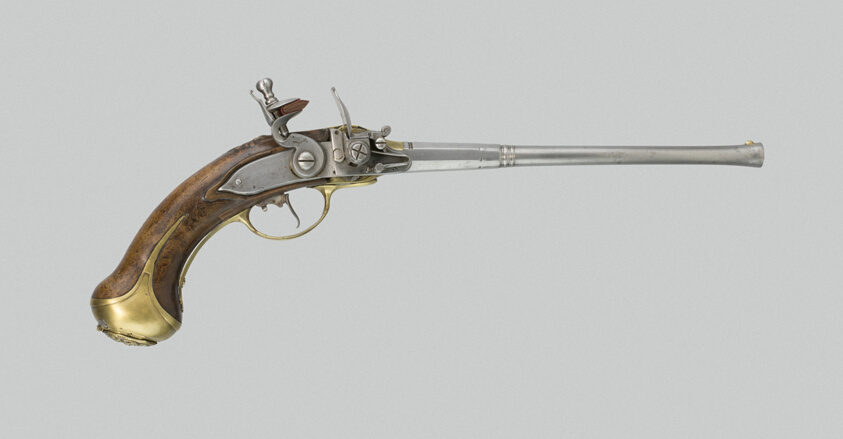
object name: Arms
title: Flintlock Magazine Pistol (Lorenzoni System)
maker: August Wetschgin (German, active 1676-90); Germany, Augsburg or Austria, Vienna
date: About 1690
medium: Walnut, steel, and brass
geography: Germany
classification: firearm-handgun; arms; arms and armor